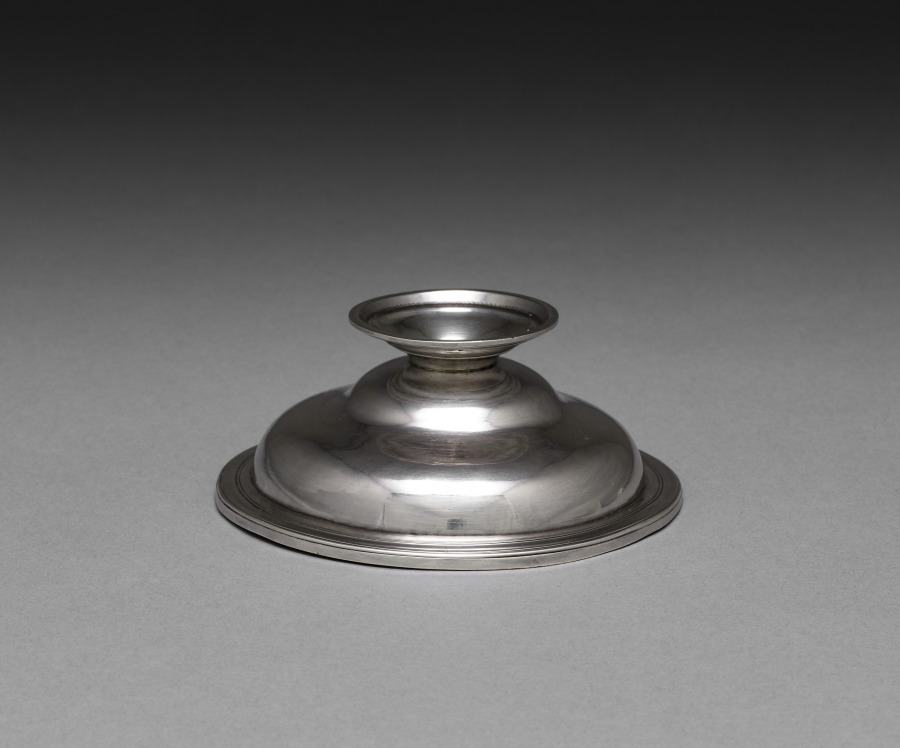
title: Cover for a Sugar Bowl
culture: America, Massachusetts, 18th century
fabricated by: Thomas Lynde (American, 1748–1811)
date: c. 1770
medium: silver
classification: Silver